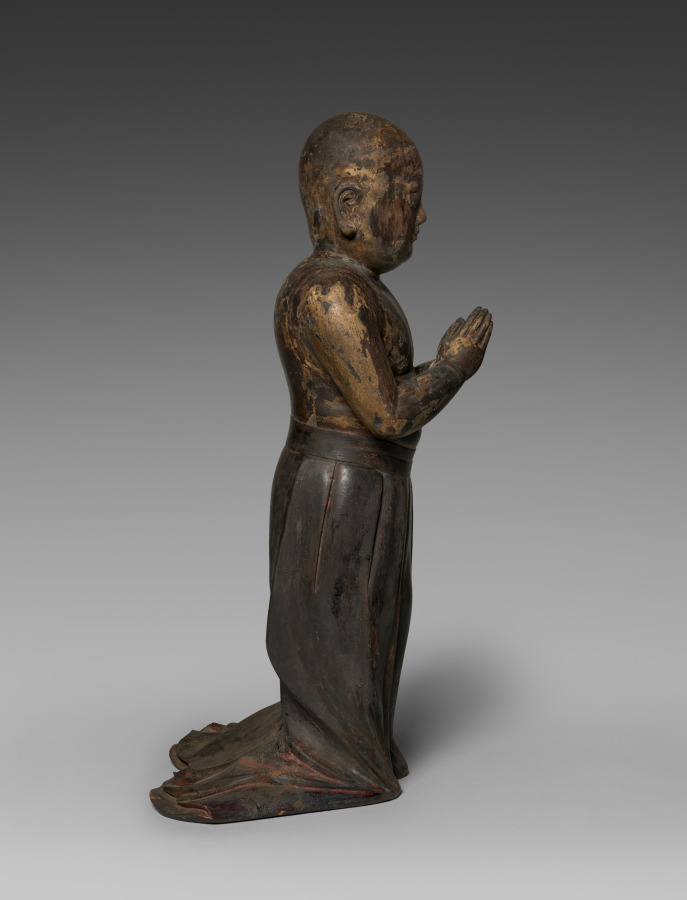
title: Prince Shōtoku at Age Two (Shōtoku Taishi)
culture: Japan, Kamakura period (1185–1333)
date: early 1300s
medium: Wood with lacquer, color, and rock-crystal inlaid eyes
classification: Sculpture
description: Two-year old Prince Shōtoku (573?–622?) places his palms together in a gesture called gasshō. Shōtoku played a major role in the introduction of Buddhism to Japan, and devotees of the prince commissioned painted and sculpted images commemorating important moments of his life. At age two, the prince faced east and chanted the name of the Buddha without having been taught the practice. This sculpture captures the fantastic event foreshadowing his future acts.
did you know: Shōtoku Taishi had several titles. One translates to "the prince of the stable door" because he was said to have been born in the imperial stables.